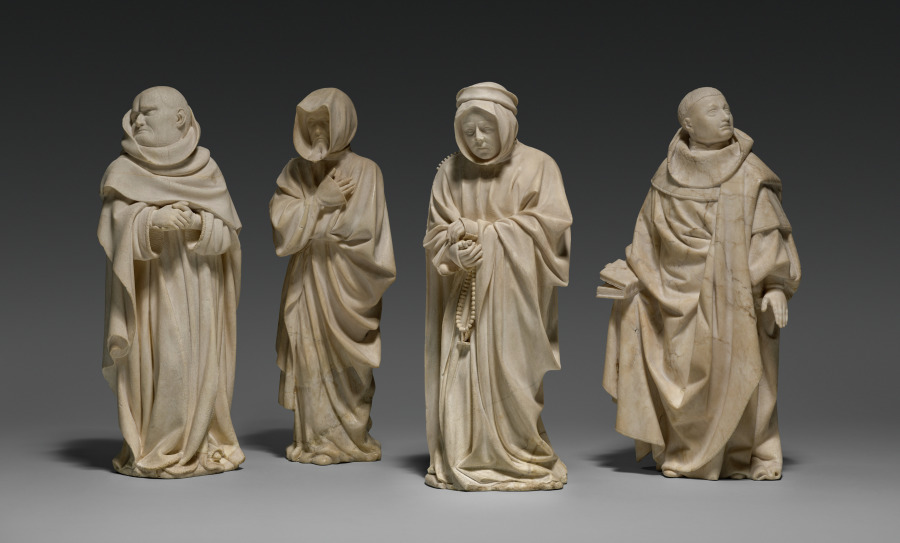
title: Mourner from the Tomb of Philip the Bold, Duke of Burgundy (1364–1404)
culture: Netherlands, active Dijon, 15th century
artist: Claus de Werve (Netherlandish, 1380–1439)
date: 1404–1410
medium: vizille alabaster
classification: Sculpture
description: This figure comes from the tomb of Duke Philip the Bold from the church of Champmol near Dijon (Burgundy, France). Philip, who founded the monastery and designated it as his burial place, hired the best artists, many of whom came from the Netherlands. While the commission was given in 1381, the work was not completed until 1410, six years after the duke’s death. This mourner is unusual for the time because it is not carved as a static low relief on the pedestal of the tomb but interacts with the viewers and their fellow procession members. The lifelike quality of the figure is due in large part to the alabaster. Its softness allowed artists to carve details into the material, and the transparent, milky white stone could also be polished to a high gloss.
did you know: During his life, Duke Philip founded the monastery of Chartreuse de Champmol to serve as a final resting place for himself and his family.